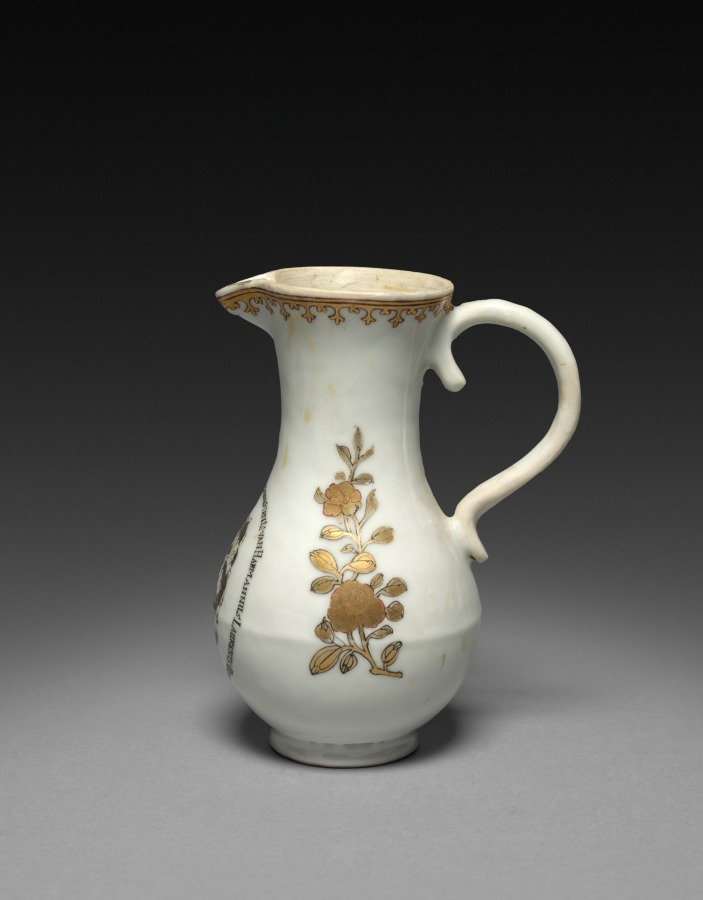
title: Creamer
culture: China, Chinese Export, 18th century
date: 1749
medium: porcelain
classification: Ceramic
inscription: "TER GEDAGHTENIS VAN HARMANNUS LAURENTS DISCHER HOOFT VAN COMMISSARISSEN EN PRAUW VOERDERS OP BATAVIA A° 1749" (In memory of Hermann Laurents Discher Head of the Commissioners and "Prauw" [boat] Traders of Batavia, 1749).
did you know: Milk jugs with lids or covers usually held warm milk for coffee or tea.